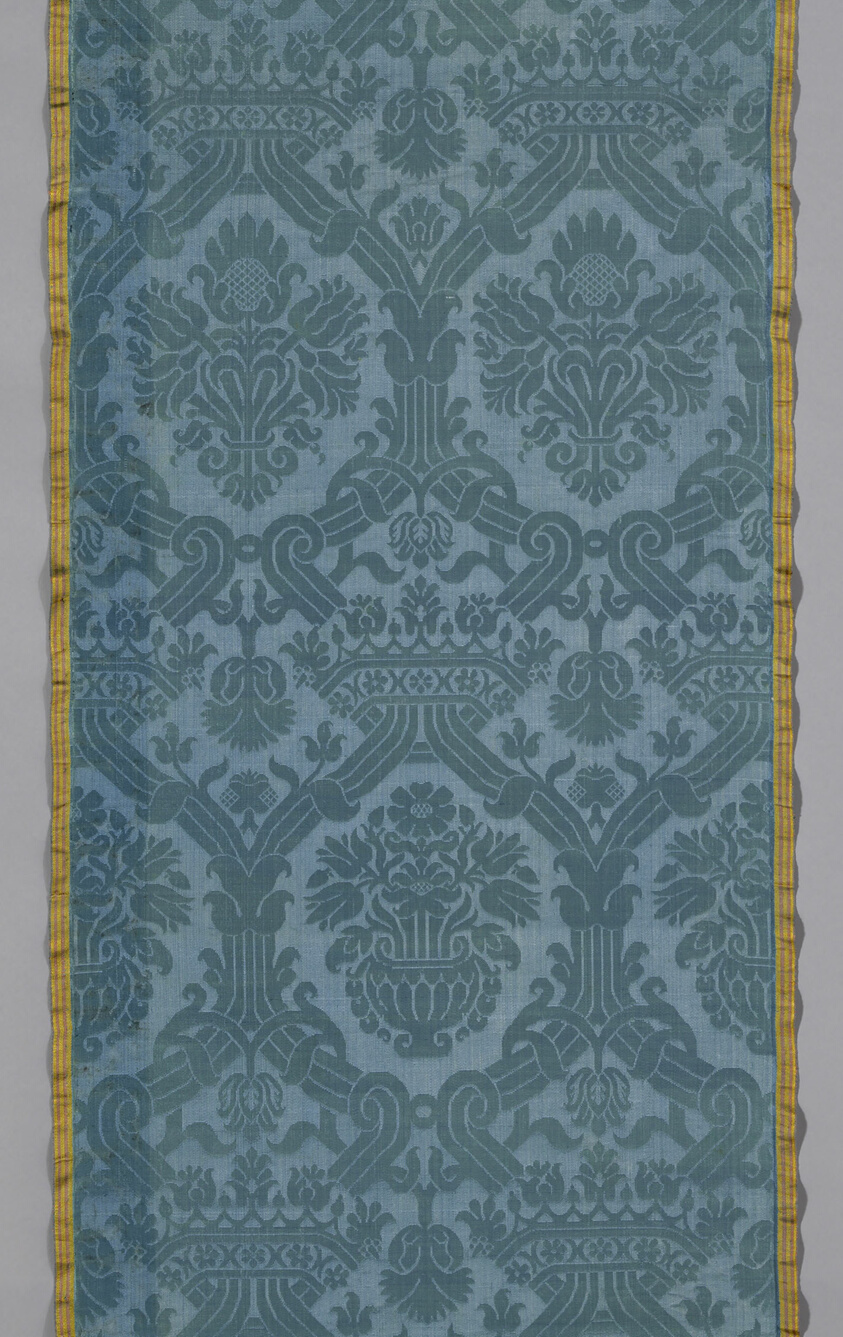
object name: Textile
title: Panel (Furnishing Fabric)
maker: Italy or Spain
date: c. 1600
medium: Silk, 4:1 satin damask weave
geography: Italy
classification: textile; weaving; furnishing textile